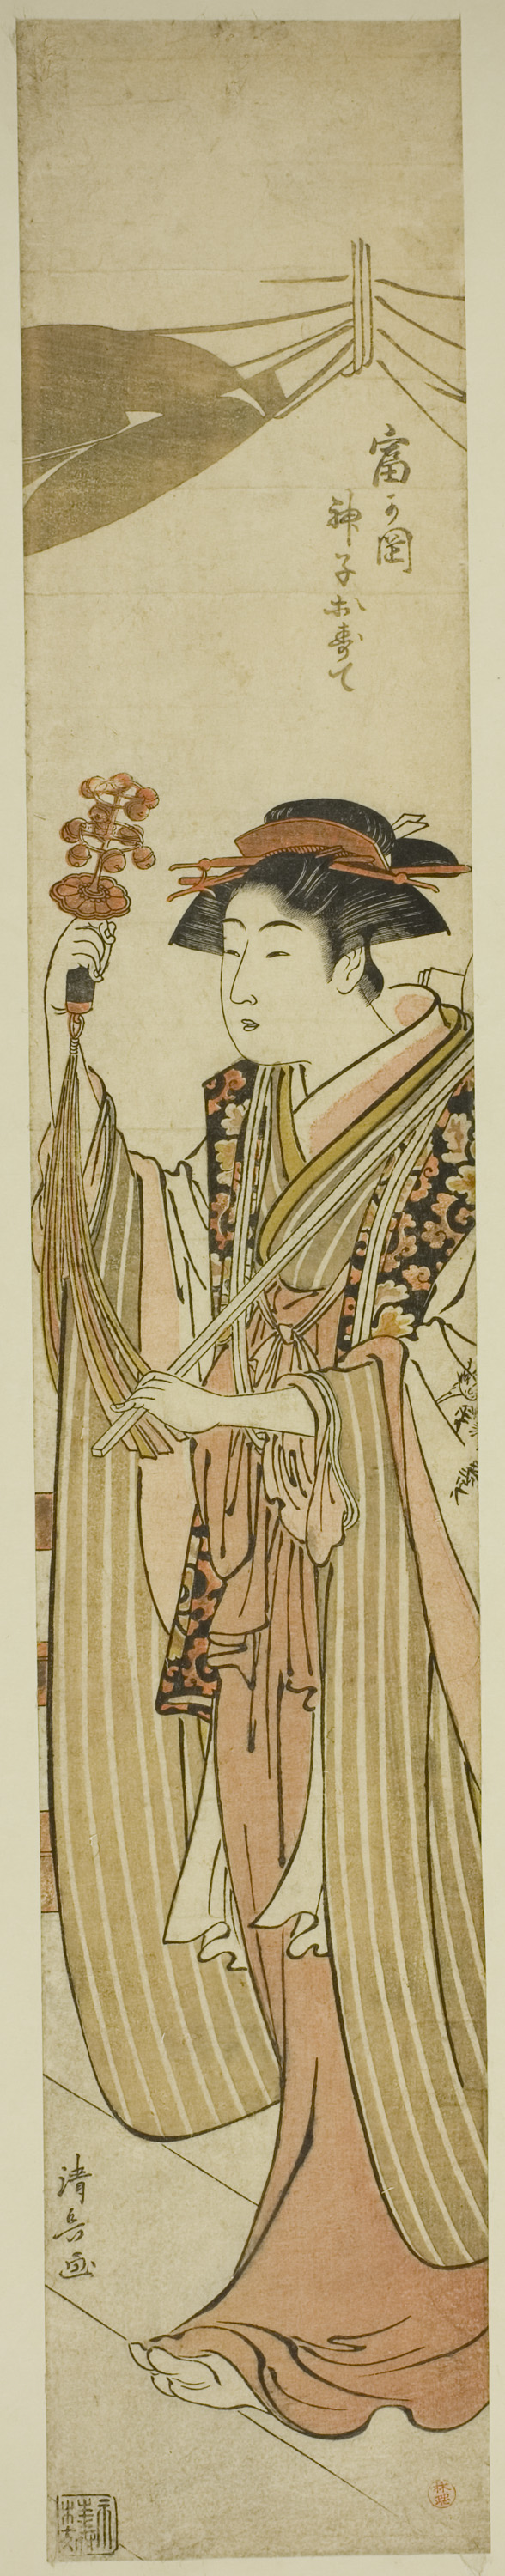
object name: Print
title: The Shrine Maiden Osute of the Tomigaoka Shrine (Tomigaoka miko Osute)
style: Japanese (culture or style)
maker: Torii Kiyonaga (Japanese, 1752-1815)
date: c. 1782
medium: Color woodblock print; hashira-e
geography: Japan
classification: woodblock print; print; asian art